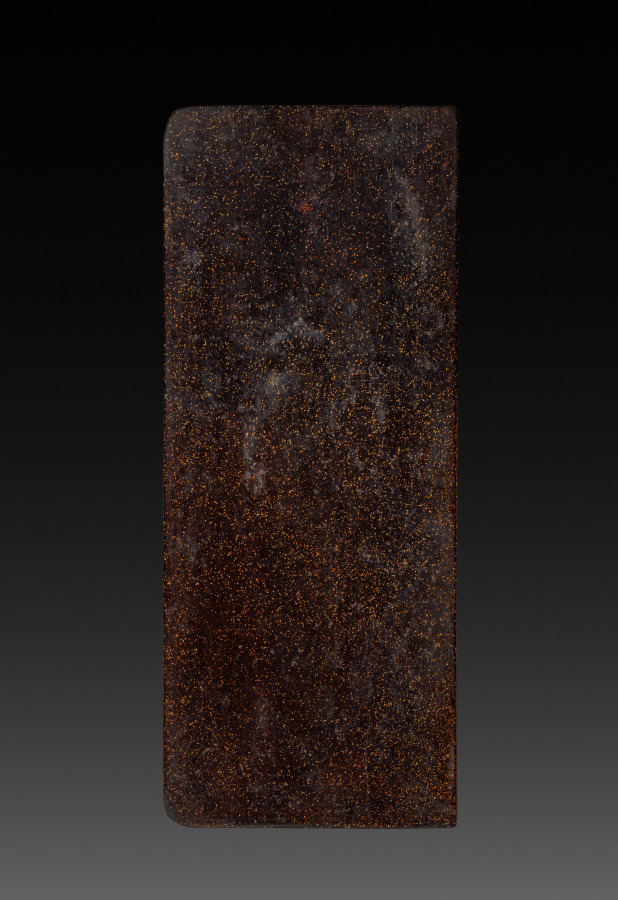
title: Writing Box (Suzuribako) with Phoenix in Paulownia (tray)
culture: Japan, Momoyama period (1573–1615)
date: c. 1573–99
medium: Lacquer on wood with sprinkled gold and silver powder (maki-e) and gold and silver foil application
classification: Lacquer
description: The only place the mythical phoenix will perch is in the paulownia tree. Along with the dragon, the bird is a symbol of imperial power in East Asia. This box––a container for an inkstone, brushes, and ink––is both functional and lavish, its dramatic effects achieved with a pear-skin ground decoration (nashiji) and sprinkled powder decoration in high relief (takamaki-e).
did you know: The only place the mythical phoenix will perch is the paulownia tree.